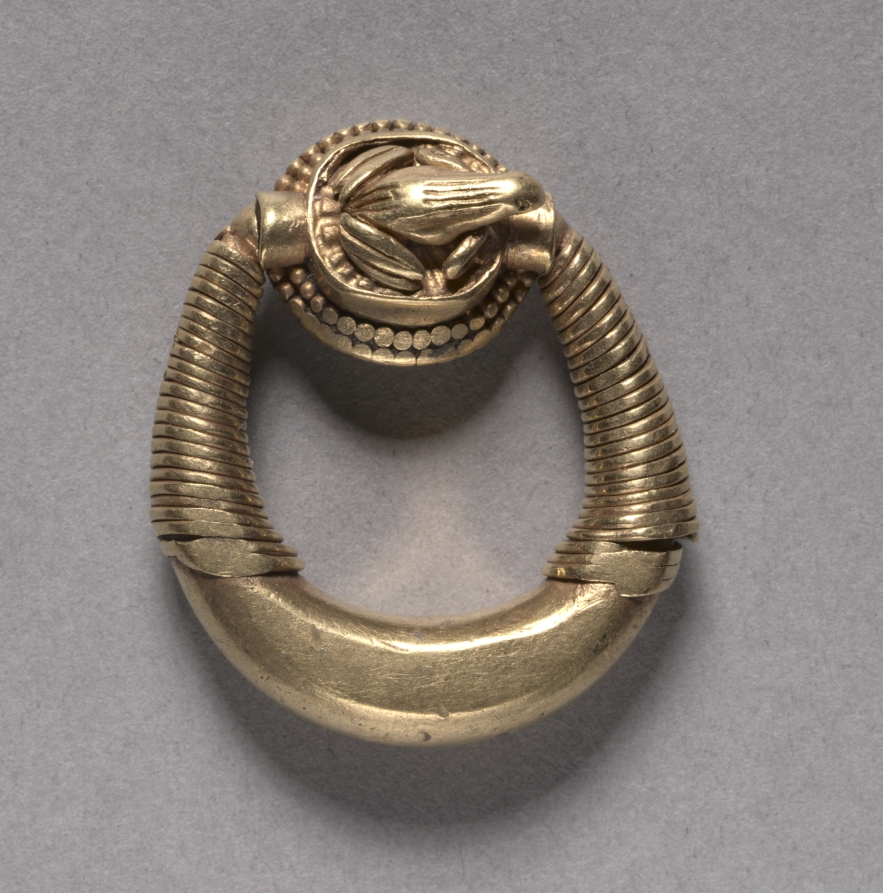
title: Finger Ring with Frog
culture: Egypt, New Kingdom (1540–1069 BCE), Dynasty 18, reign of Akhenaten (1351–1334 BCE)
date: c. 1353–1337 BCE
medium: gold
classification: Jewelry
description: The shank or band of this ring is crescent-shaped and circular in section; its upper sections are covered with heavy gold wire. The oval bezel on a swivel, the metal that holds the stone, takes the form of a scaraboid, or seal amulet in the shape of a scarab. Its sides are encircled by a double row of granules and are surmounted by a delicately molded frog in the round. The underside is incised with a nefer-sign to the right and a wedjat-eye.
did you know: An exact duplicate of this ring, apart from the inscription, is in the Royal Scottish Museum in Edinburgh.